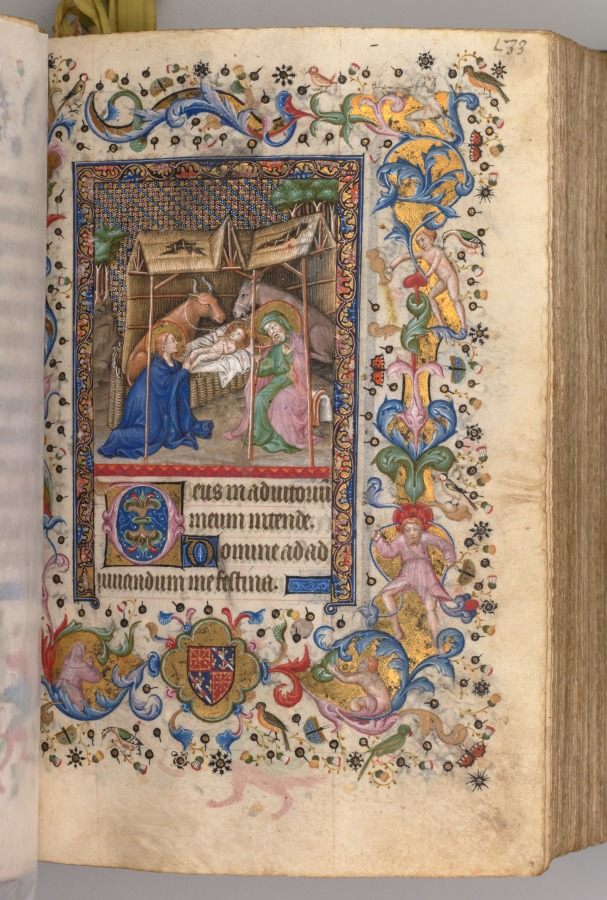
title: Hours of Charles the Noble, King of Navarre (1361-1425): fol. 67r, Nativity (Prime)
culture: France, Paris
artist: Master of the Brussels Initials and Associates (French)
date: c. 1405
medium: ink, tempera, and gold on vellum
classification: Bound Volume